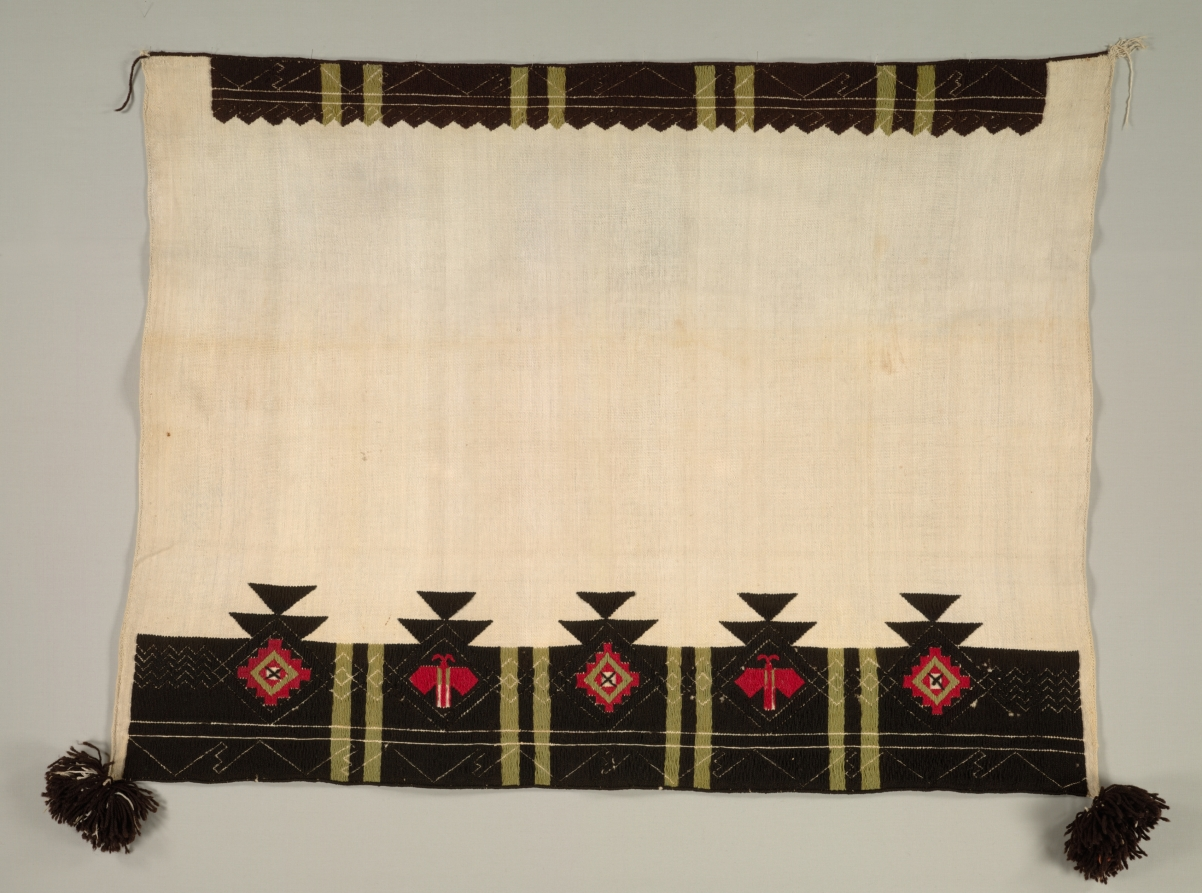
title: Ceremonial Manta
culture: America, Native North American, Southwest, Pueblo, Post-Contact, Late Classic Period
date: c. 1863–1874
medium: plain weave with embroidery: cotton and wool (handspun, Gerrnantown, and bayeta)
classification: Textile